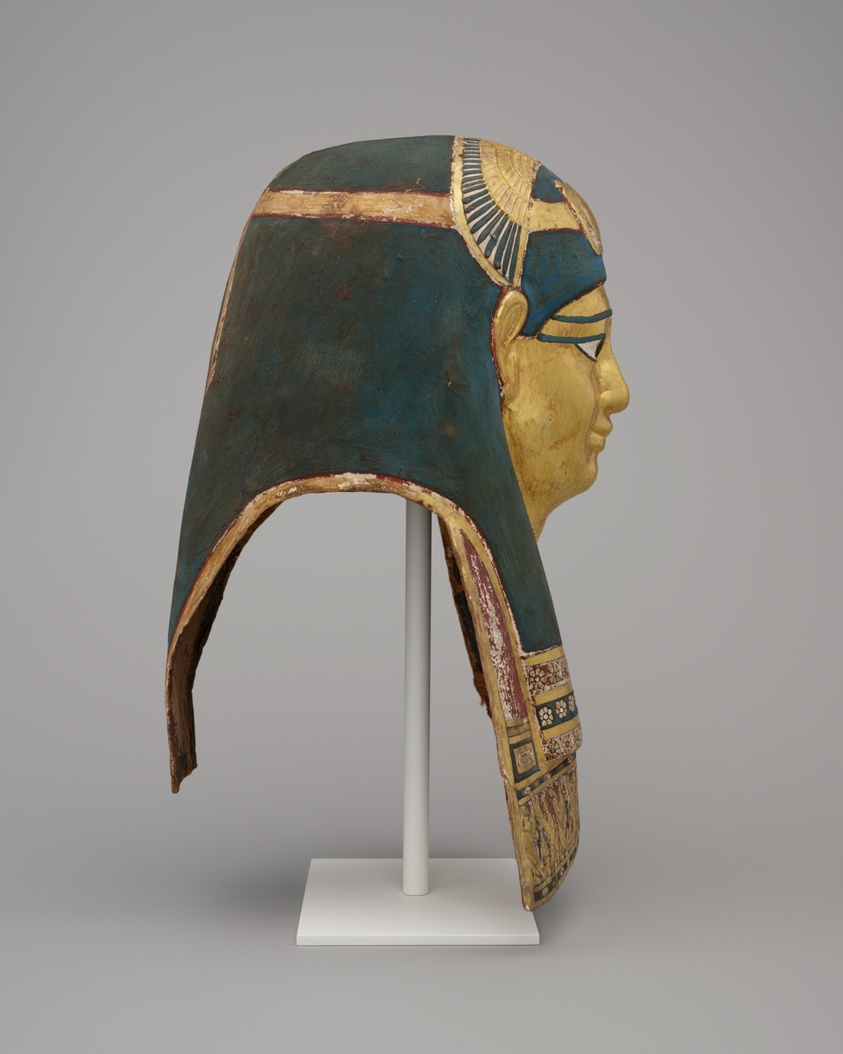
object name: Funerary Object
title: Funerary Mask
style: egyptian, ancient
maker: Egyptian; probably from Hawara, Egypt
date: Late Ptolemaic Period-early Roman Period, 1st century BCE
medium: Cartonnage, gold leaf, and pigment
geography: Egypt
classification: mummy goods; mummy masks; mummy portraits; ancient art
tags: masks